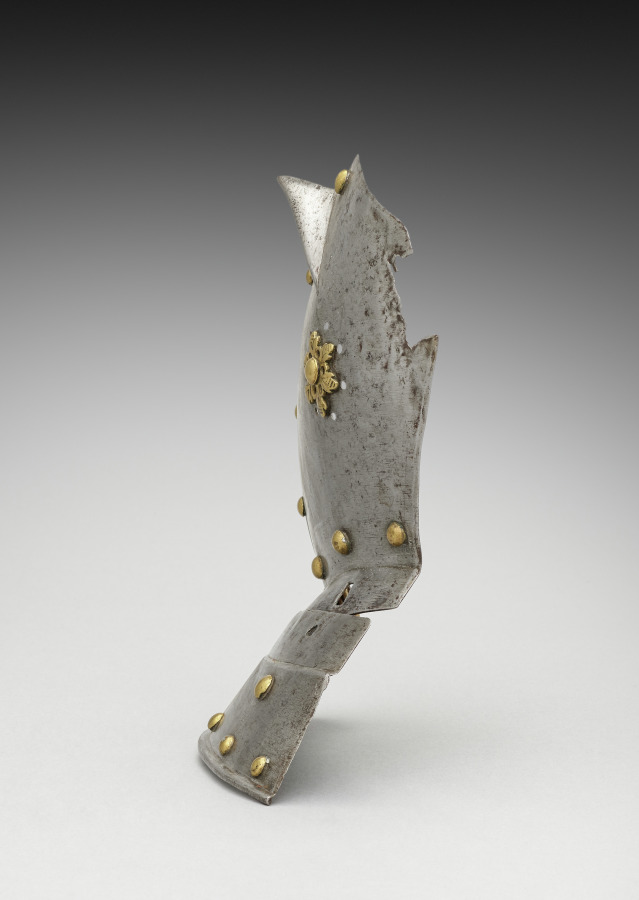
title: Ear Piece of a Helmet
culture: Germany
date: 1500s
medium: steel, brass headed rivets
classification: Arms and Armor